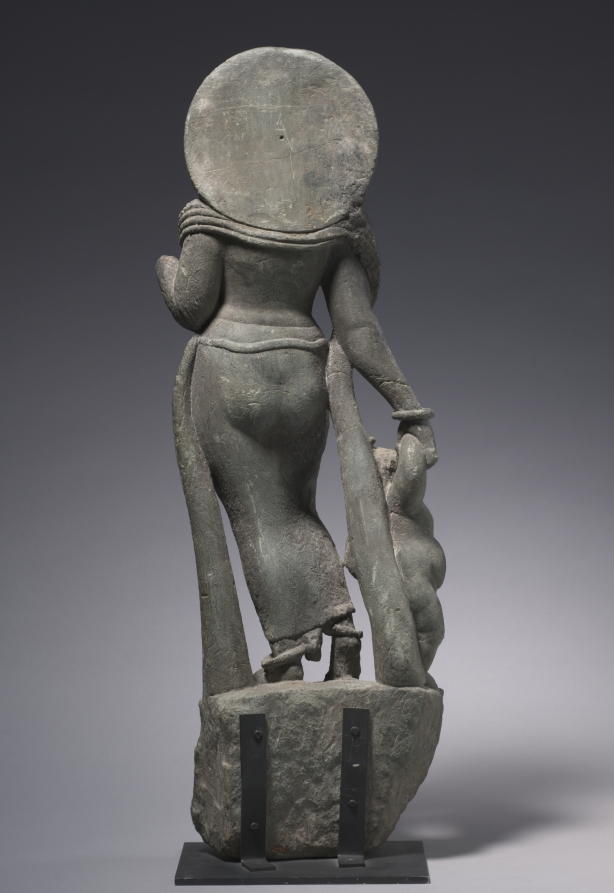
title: Mother Goddess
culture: Northwestern India, Rajasthan, Udaipur District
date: c. 600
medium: schist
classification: Sculpture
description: Sets of mother goddesses were installed in shrines near the entrance to Hindu temples. From one of the most naturalistic and charming sets, this mother attentively grasps the wrist of her toddler to gently guide him, while smiling lovingly and patiently at him. The simplicity of garments and ornament is characteristic of sculpture of the sixth century, and the naturalistic qualities of this work from northwestern India suggest connections with the Greco-Roman styles of Gandhara, in present-day Pakistan.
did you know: This sculpture was one of twelve that were brought to a modern temple known as the Tanesar (Thaneshvara) Mahadeva Temple.